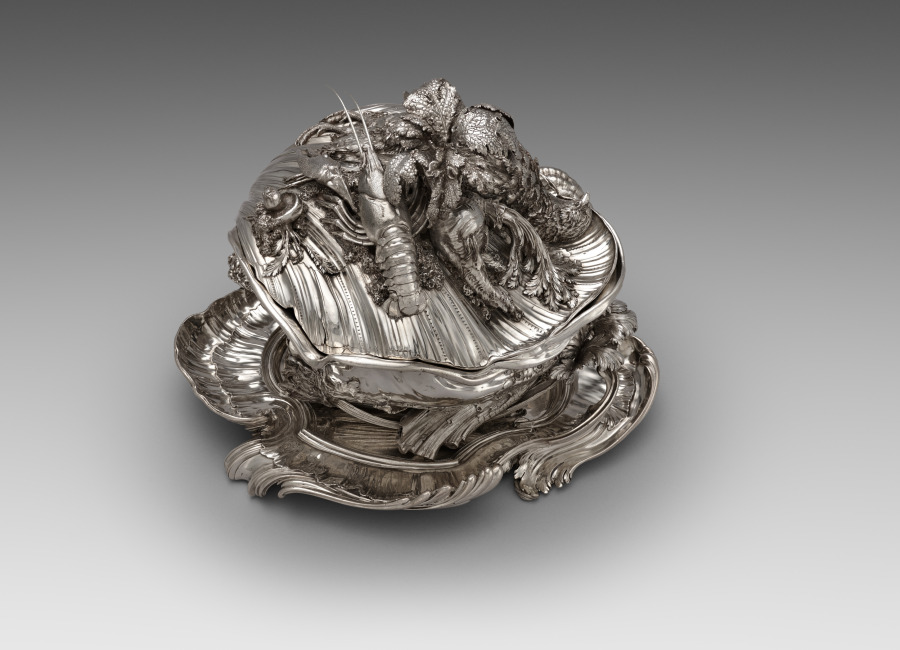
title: Covered Tureen on Stand (Pot-à-oille)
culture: France, Paris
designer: Juste-Aurèle Meissonnier (French, 1695–1750)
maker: Pierre-François Bonnestrenne (French)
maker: Henry Adnet (French, 1745)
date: 1735–38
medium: silver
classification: Silver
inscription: [Maker’s mark of Pierre−François Bonnestrenne, beneath platter; inside tureen (two marks)]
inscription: [Warden's mark for Paris, 1734−1735, beneath platter; inside tureen; inside cover]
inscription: [Charge mark of Hubert Louvet, Paris, 1732-1738, on platter border; beneath platter; beneath tureen; inside cover; inside tureen (two marks)]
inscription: [Discharge mark of Louis Robin mostly used for stamping small work, Paris 1738−1744, on platter border; beneath tureen]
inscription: [Warden's mark for Paris, 1736−1737, on platter border]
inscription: [Possibly British import mark, London, 1925, on platter border]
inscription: [Possibly mark of the British firm Charles & Richard Comyns, on platter border]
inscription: [Discharge of Louis Robin mostly used for stamping gold and silver between 1738 and 1744, beneath tureen; outside cover]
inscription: [Maker’s mark of Henry-Guillaume Adnet, inside cover]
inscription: [Two small undefined marks, inside cover]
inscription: [Under the surface of the platter the engraved signature]: “FAIT-PAR-I-A-MEISSONIER-ARCHITECTTE”; [and the weight] “673=5"; “No. [v] I 50 £ b76Sol”; [and the numbers] “A nº 1”; “A nº2”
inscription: [On tureen lip]: "MEISSONIER"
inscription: [On tureen lip]: “A nº 3”; “A nº2” [in order to place the tureen correctly on the stand]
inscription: [Numbers engraved on the stand, the tureen, and the cover to show how the piece should be assembled]: “A nº 1” [on the base of the tureen; beneath the cover; on the platter], “A nº 2” [on the platter], “A nº 3” [on the exterior rim of the tureen], “A nº4”; “A nº 5” [outside the cover], “A nº 7” [on the border of the platter]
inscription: [Two warden's marks for Paris, 1735-1736, beneath tureen]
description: This tureen exemplifies the French Rococo style, an artistic movement celebrating naturalistic forms that developed in Paris during the early 1700s. In contrast to classical, controlled symmetry, Rococo forms morph, twist, and spill into the space around them. Meissonnier embellished this tureen in a picturesque arrangement of vegetables and creatures, transforming a utilitarian object into a decadent display of wealth and abundance. This masterpiece comes from a set of two tureens commissioned by the English Duke of Kingston during an extended stay in Paris in the 1730s.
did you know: The langoustine, pigeon, and vegetables were cast using real examples giving the silver copies lifelike detail and appearance.